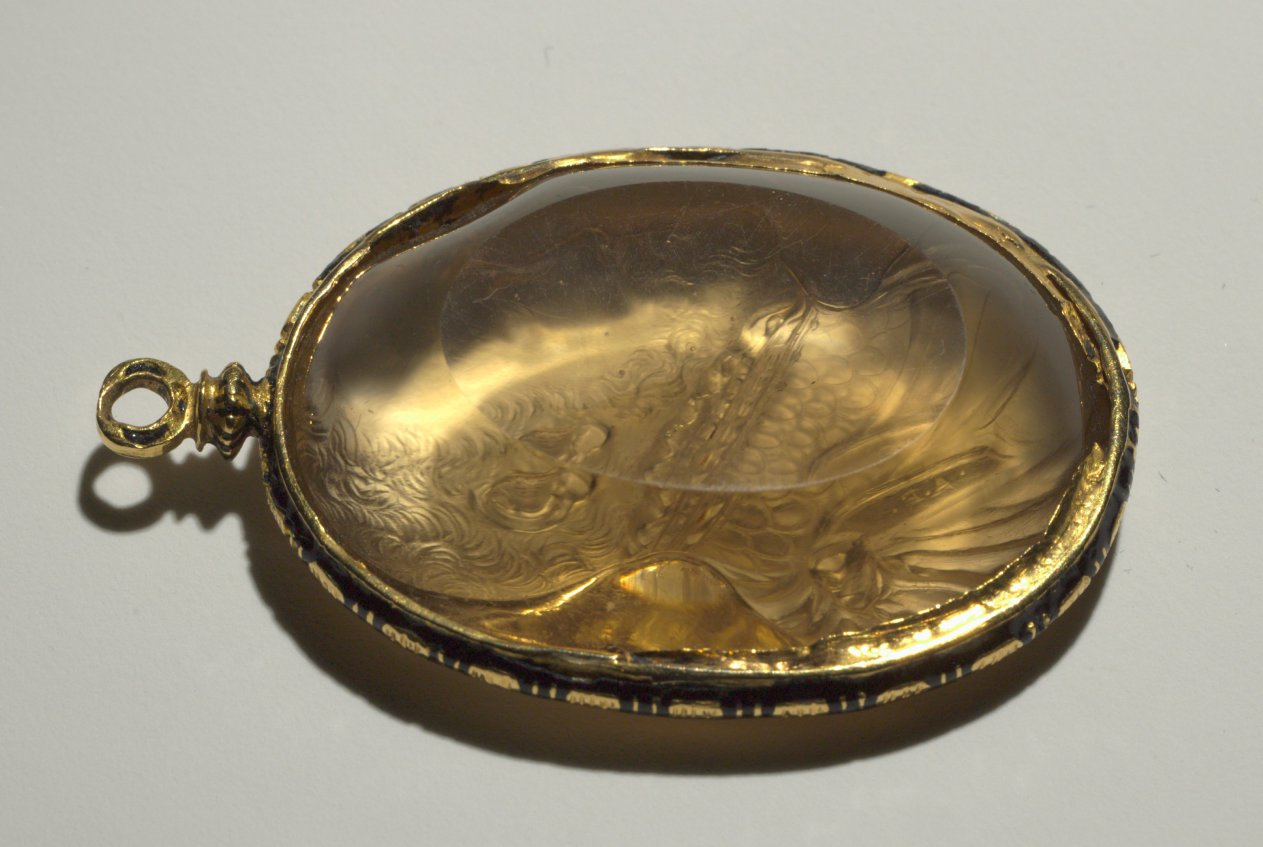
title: Portrait of Philip II, King of Spain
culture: Italy, 16th century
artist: Alessandro Cesati (Italian, before 1538-after 1564)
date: mid-1550s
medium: citrine, mounted in a gold and enamel pendant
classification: Sculpture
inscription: Signed on collar .A.E. (Likely abbreviation for “ΑΛΕΞΑΝΔΡΟΣ ΕΠΟΙΕΙ”, or “Alexandros Epoiei,” which translates to “Alexander made [me / this].”)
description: Clad in armor, Philip II wears a chain with the Order of Golden Fleece around his neck. The remarkably precise and varied cutting describes the textures of cloth, metal, skin, and hair while presenting the king’s features with striking naturalism—complete with receding hairline and prominent chin—as well as conveying his forceful character. Carved gems were luxury arts of the highest order in the Renaissance, hotly collected and used as diplomatic gifts. The original patron is not yet known, but cameos played a prominent role at the Spanish court, where the royal family often hold gems of Philip II in their portraits. The yellow quartz, rare in the 1500s, probably came from a newly opened source in South America; this object is thus both a natural marvel and a masterful portrait. One of only three known works signed by the artist (his initials appear at miniscule scale on the collar just below the knot of cloth), this stone is also likely in its original setting.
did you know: The ancient Romans believed citrine, a type of quartz, offered protection against evil thoughts.